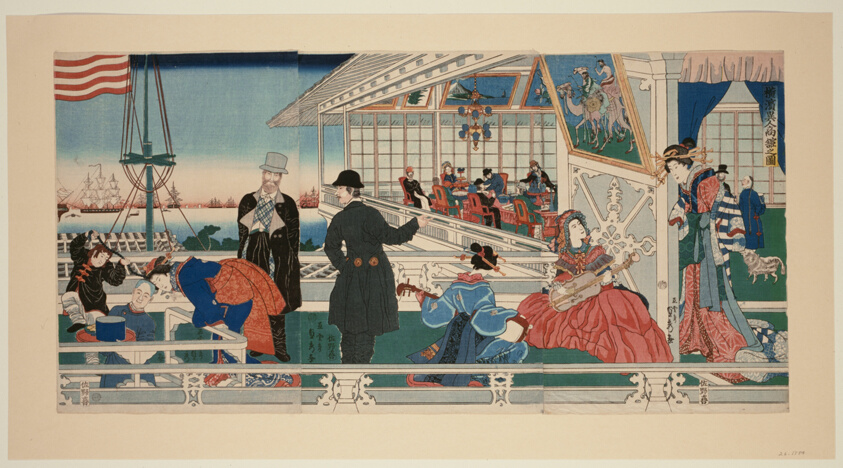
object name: Print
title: An American Mercantile Building in Yokohama (Yokohama ijin shokan no zu)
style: Japanese (culture or style)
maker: Utagawa Sadahide (Japanese, 1807-1873)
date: 1861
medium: Color woodblock print; oban triptych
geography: Japan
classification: woodblock print; print; asian art